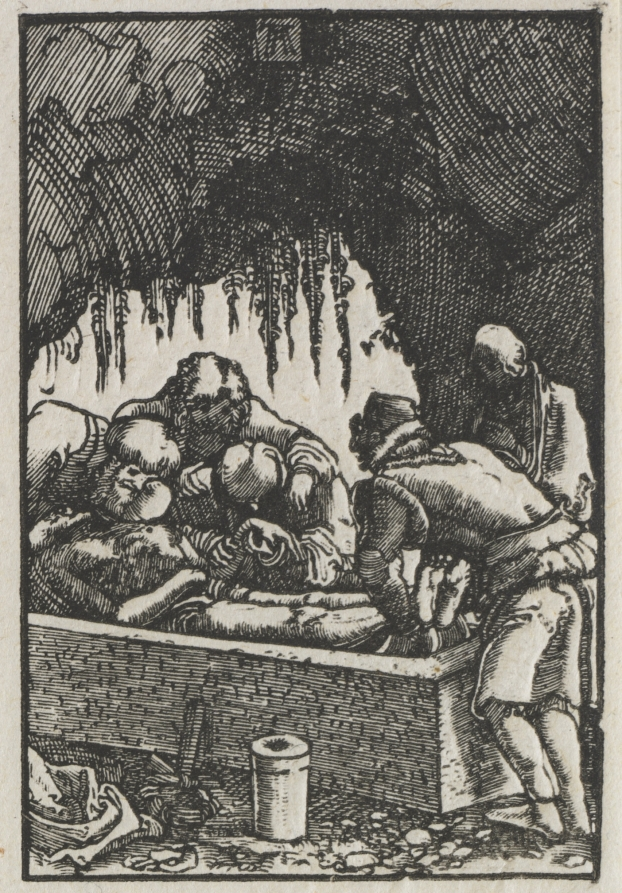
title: The Fall and Redemption of Man: Burial of Christ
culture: Germany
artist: Albrecht Altdorfer (German, c. 1480–1538)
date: c. 1515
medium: woodcut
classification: Print